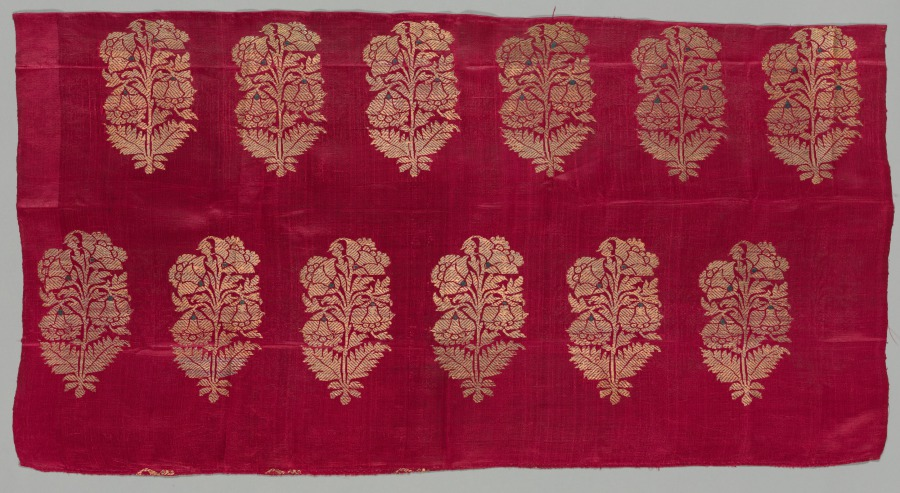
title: Brocade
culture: India, Benares ?, 18th-19th century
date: 1700s - 1800s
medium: brocade, Kimkhwab; silk and gold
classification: Textile